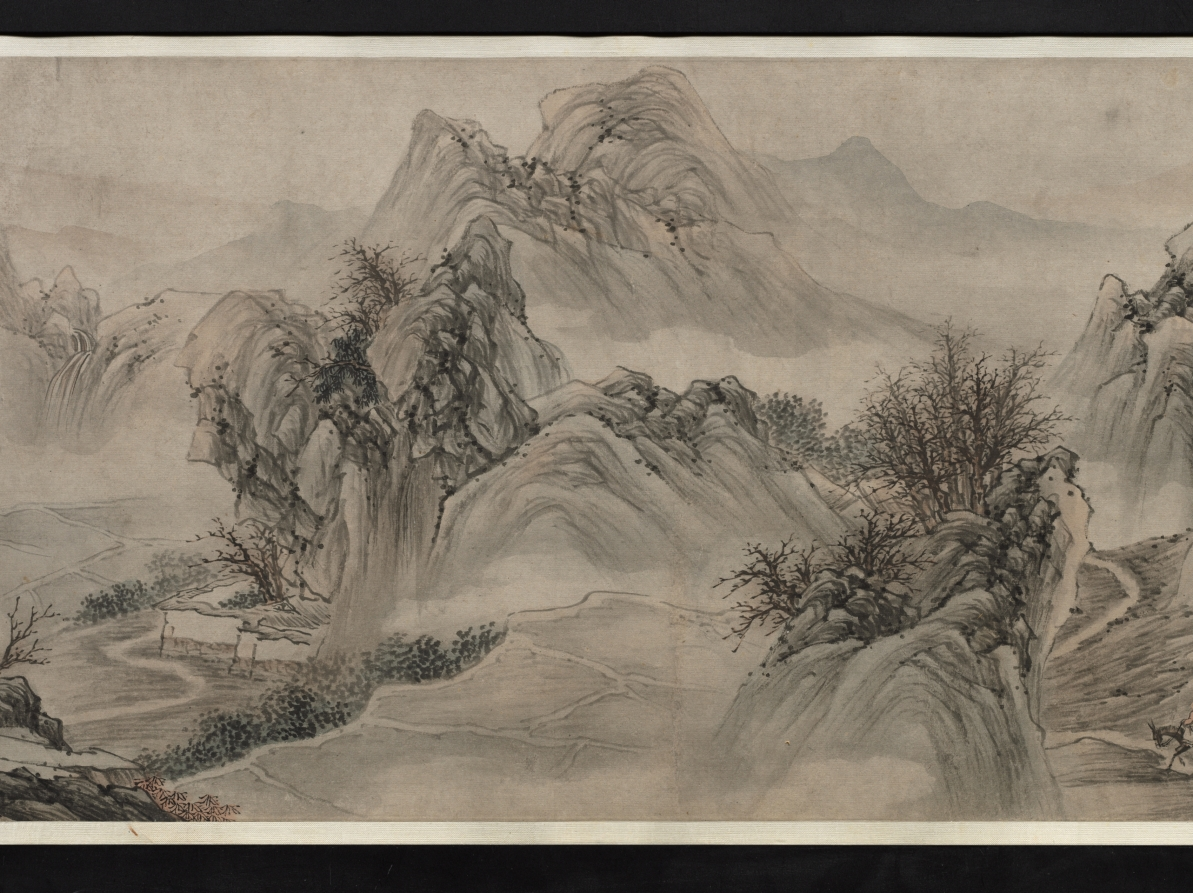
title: Autumn Mist in the Countryside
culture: China, Qing dynasty (1644-1911)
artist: Zou Zhe (Chinese, c. 1610-before 1688)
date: 1647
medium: handscroll, ink and color on paper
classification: Painting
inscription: Artist's inscription, signature, and seal: The first day of the sixth lunar month, the ting-hai year [1647], Tsou Che painted [this]. [seal] Fang-lu.